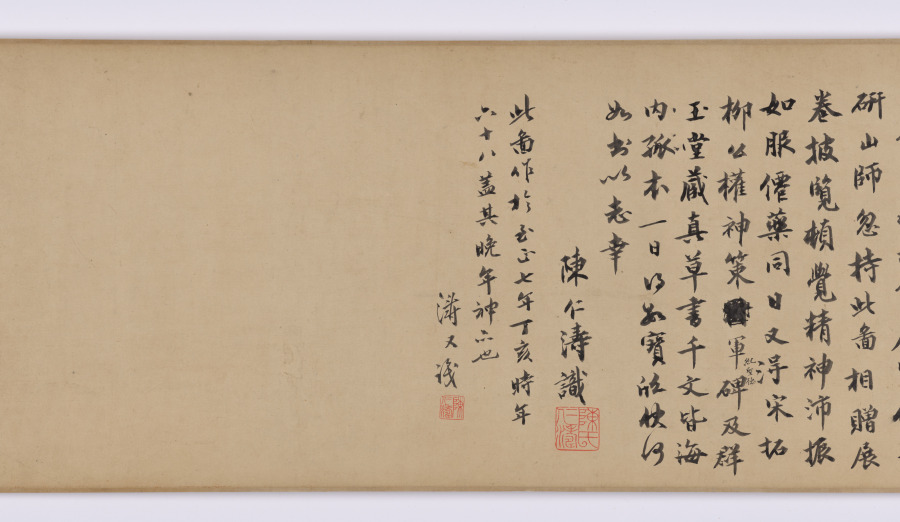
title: Poetic Feeling in a Thatched Pavilion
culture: China, Yuan dynasty (1271-1368)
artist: Wu Zhen (Chinese, 1280–1354)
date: 1347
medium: handscroll; ink on paper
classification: Painting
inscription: 依村構草亭，端方意匠宏。 林深禽鳥樂，塵遠竹松輕。 泉石俱延賞，琴書悅性情。 何當謝凡近，任適慰平生。 至正七年丁亥冬十月，為元澤戲作草亭詩意。梅沙彌書 [印]楳華盦; 嘉興吳鎮仲圭書畫記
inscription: 我愛梅花翁，巨老傳心印。 脩此水墨缘，種種得蒼潤。 樹石墮筆鋒，造化不能吝。 而今橡林下，我願執掃汛。 後學沈周 [印]启南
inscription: Colophon by Chen Rentao (1952): 予求梅道人畫二十年不可得。所見多膺鼎，即故宮所藏山水數軸都不可靠。傳世真迹，惟《漁父圖》、《嘉禾八景》與此《草亭詩意》而已。壬辰十月十四日余大病初愈，居家休養，研山師忽持此圖相贈。展卷披覽，頓覺精神沛振，如服僊藥。同日又得宋拓柳公權《神策軍紀聖德碑》，及群玉堂藏《真草書千(字)文》，皆海內孤本。一日得數寶，欣喜何如，書以志幸。 陳仁濤識 [印]陳氏仁濤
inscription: Colophon by Chen Rentao: 此圖作於至正七年丁亥，時年六十八，盖其晚年神品也。 濤又識 [印]陳仁濤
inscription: Title on frontispiece by Li Dongyang 李東陽 (1447-1516).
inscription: 33 additional seals: 1 seal of Li Chao-heng 李肇亨 (1592-1664)：檇李李肇亨書畫記; 9 seals of Liang Qingbiao 梁清標 (1620-1691): 蒼巖子、蕉林、蕉林梁氏書畫之印、蕉林秘玩、蕉林書屋、蕉林玉立氏圖書、棠邨 (appears twice)、棠邨審定; 1 seal of Wang Yirong (1845-1900): 懿榮; 3 seal of Li Yanshan (1898-1961): 雙銕笛樓 (appears twice)、硯山心賞; 12 seals of Chen Rentao 陳仁濤（1906-1968）：陳氏仁濤、陳仁濤珍藏印、金匱寶藏·陳氏仁濤 (appears three times)、金匱秘笈、金匱室、金匱室精鑒璽 (appears twice)、金匱室主、金匱神品、仁濤奇緣; 1 seal: 崐溟居士; 1 seal: 林止在㭯生圖書印; 3 seals unidentified.